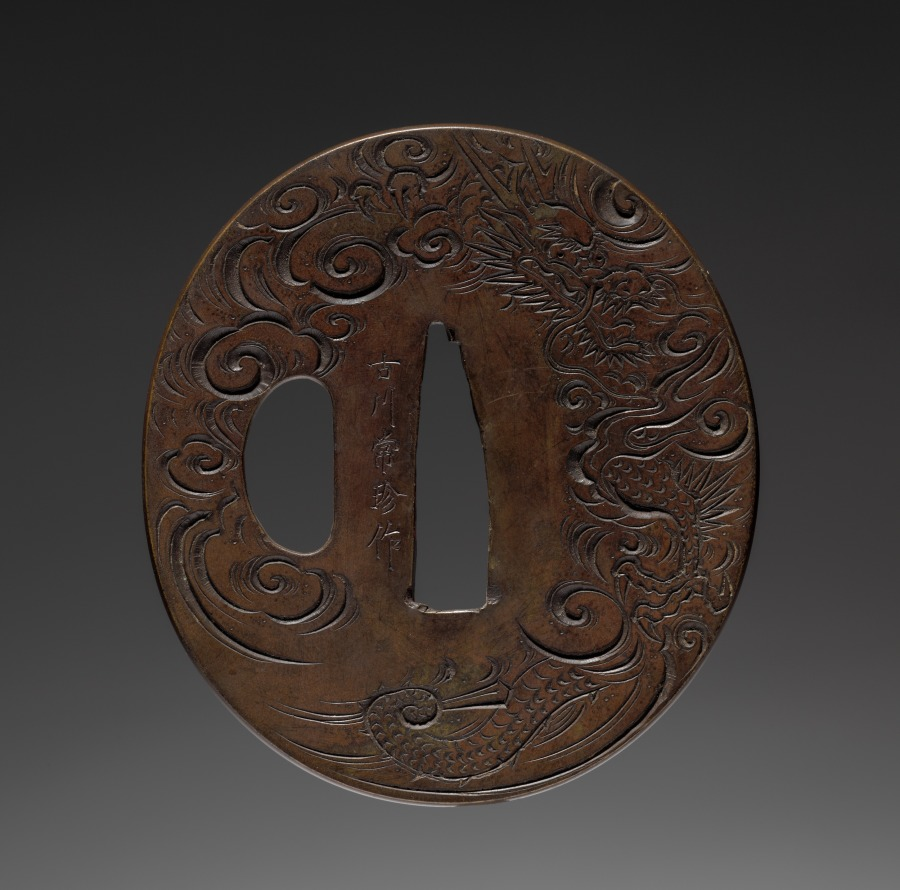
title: Sword Guard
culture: Japan, Edo period (1615–1868)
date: late 1700s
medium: iron (Yokoya type)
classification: Arms and Armor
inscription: signed "Furukawa Jochin made."